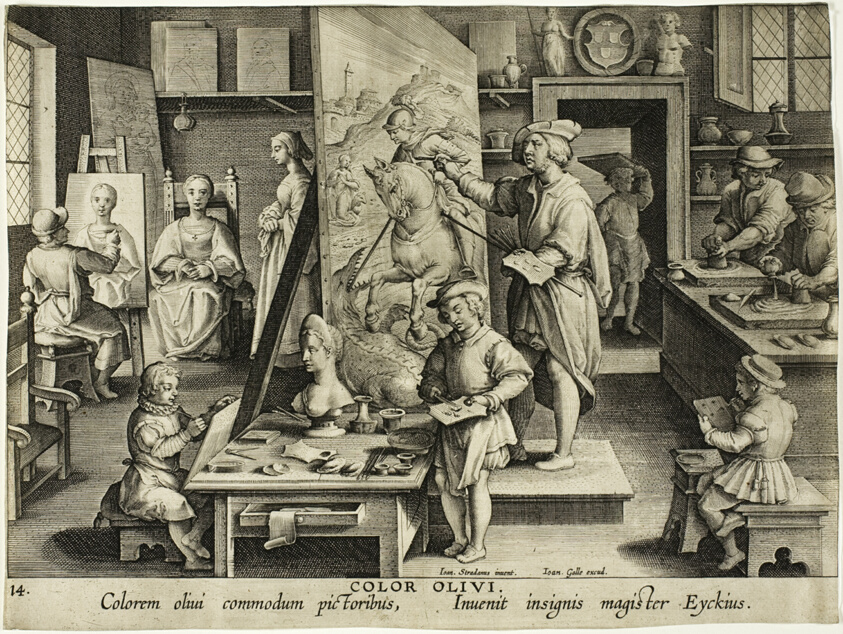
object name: Print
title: The Invention of Oil Painting, from Nova Reperta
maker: Theodoor Galle (Flemish, 1571-1633); after Joannes Stradanus (Flemish, 1523-1605)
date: c. 1591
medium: Engraving, with plate tone, in black on cream laid paper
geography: Flanders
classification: engraving; paper; print; prints and drawing